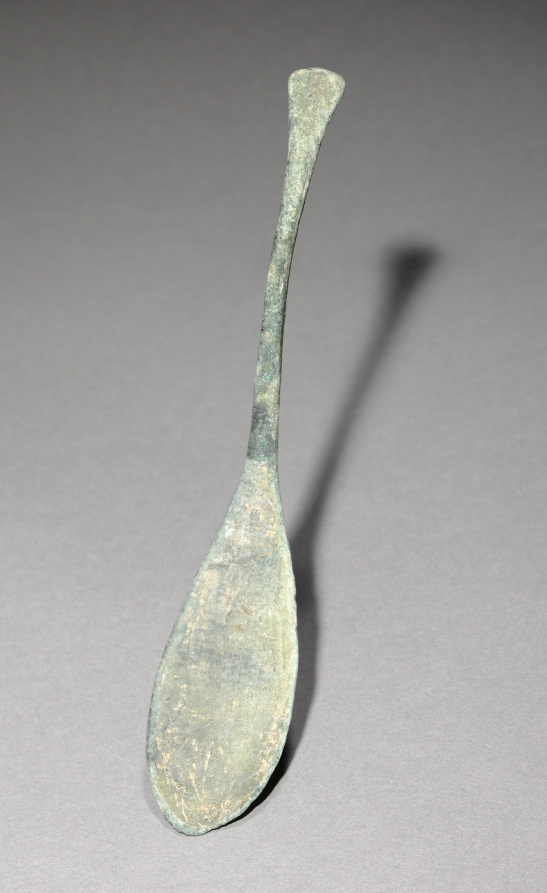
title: Spoon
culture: Korea, Goryeo dynasty (918–1392)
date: 918–1392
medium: bronze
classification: Metalwork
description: Celadons, spoons, seals, and bronze mirrors were the most common burial objects in tombs during the Goryeo period (918–1392). Furnishing tombs with an elaborate assemblage of objects was believed to honor and comfort the newly dead. Generally, Goryeo tombs were left untouched until the late 19th century. During the colonial period (1910–45), however, Japanese archaeologists hastily excavated the tombs located in Kaeseong, the former capital of the Goryeo period. Scholars recently have proposed that toward the end of the 14th century, Koreans enjoyed meat-based soups more than any other dishes, explaining why many more spoons than chopsticks were buried in tombs.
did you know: Bronze spoons are the most common burial item. This particular one with an extremely short handle is presumed to have served for filling an oil lamp.